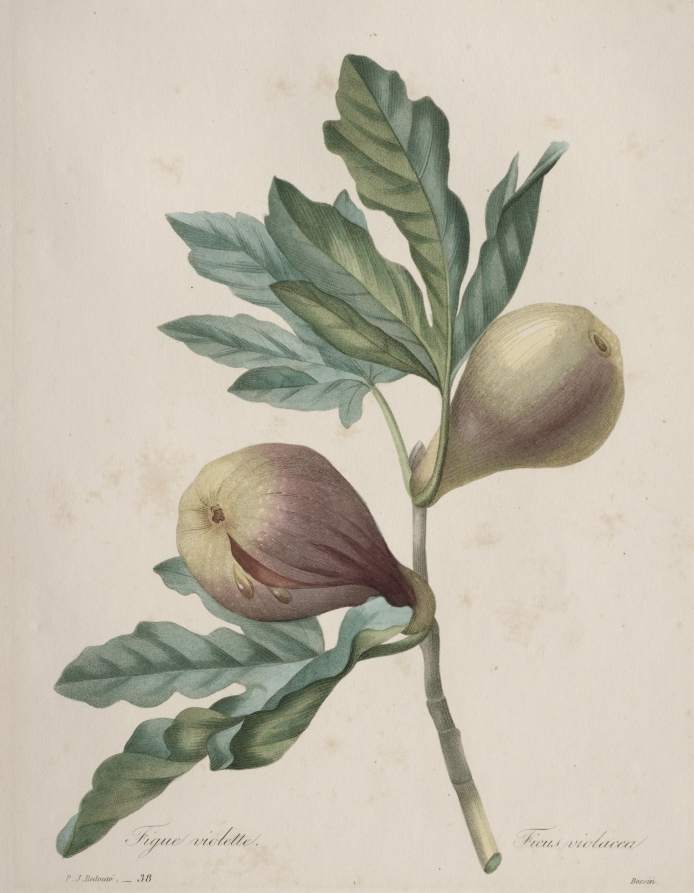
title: Choix des plus belles fleurs...plus beaux fruits: Figue Violette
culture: France, 19th century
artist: Henri Joseph Redouté (French, 1766–1853)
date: 1827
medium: stipple and line engraving, with hand coloring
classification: Print